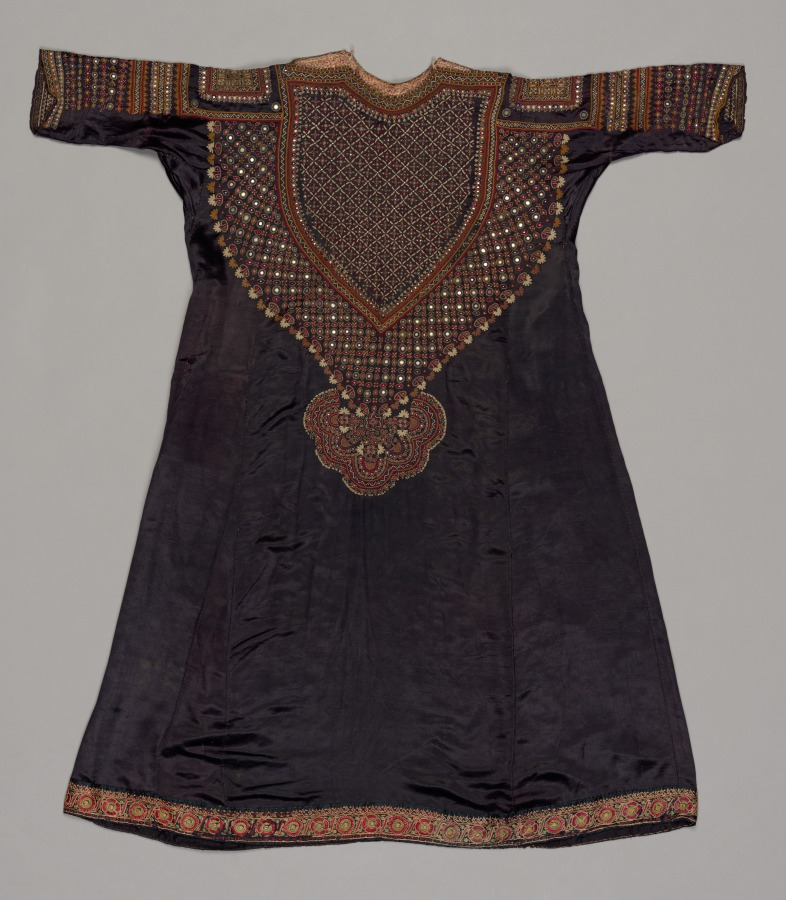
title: Dress (Choli)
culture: Western India, Gujarat, Kachchh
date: 1800s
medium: embroidery with mirror inserts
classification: Garment